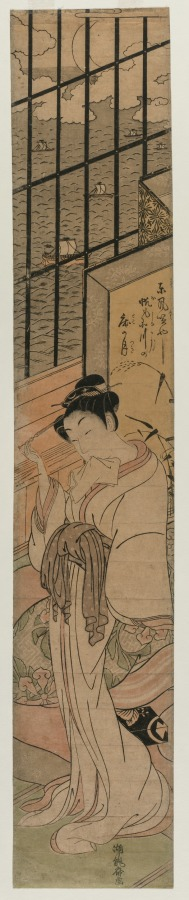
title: Courtesan in a Room Overlooking Edo Bay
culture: Japan, Edo period (1615–1868)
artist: Isoda Koryūsai (Japanese, 1735–1790)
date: c. 1770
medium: color woodblock print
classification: Print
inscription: Signature: Koryusai ga